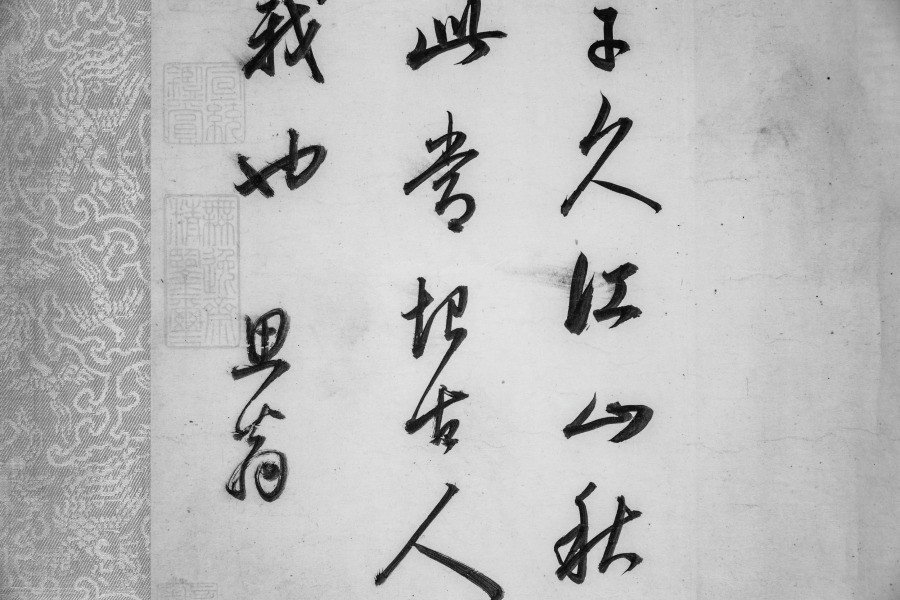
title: River and Mountains on a Clear Autumn Day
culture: China, Ming dynasty (1368–1644)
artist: Dong Qichang (Chinese, 1555–1636)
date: c. 1624–27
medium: Handscroll; ink on Korean paper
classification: Painting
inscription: 黃子久江山秋霽似此，當恨古人不見我也。思翁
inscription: 董文敏每遇高麗鏡面箋，書畫尤為入神。此卷改表紙用之，字跡隱然，兼有朝鮮之印。至於筆法圓秀，真接倪黃。豈文沈所可同日而語也。 康熙庚午中秋後一日，天氣澄爽，重裝初畢，跋於瓶廬。抱瓮翁高士奇。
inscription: Second inscription by Gao Shiqi 高士奇 (1645–1704): On the twenty-third day of the ninth month, the jiaxu year of the Kangxi era [1694], I packed my bags to head north. When my boat passed Wuchang [Suzhou], Mr. Mantang [Song Luo] brought wine to bid me farewell so that we could share our thoughts on our separation in the last few years. I showed him the paintings and calligraphy which I collected and asked his opinions. Since Mr. Mantang does not own any handscrolls by Wenmin [Dong Qichang], I leave this one for him in commemoration of our parting; thus the painting will have a worthy owner and our meeting will become a beautiful story in the future. It is the fourth day after the beginning of winter, with the sky clear and sober. Trees under frost have turned red and yellow, seemingly echoing the brush and ink in the painting. I also ask Mr. Mantang to inscribe a poem to commemorate our meeting so that it will survive forever.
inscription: 1 colophon and 4 seals of Song Luo 宋犖 (1634–1713): Who is the foremost art connoisseur of our dynasty?/ Tangcun [Liang Qingbiao, 1620–1691] is dead, so the title passes to Jiangcun [Gao Shiqi]./ Leaving office, you retired for five years in the Lake region./ Fondling handscrolls and hanging scrolls from morning to evening./ You sent me your collection catalogue Xiao Xia Lu last year;/ It is indeed the true equal of [Zhou Mi's] Yun Yan Guo Yan./ This year you returned to the capital by imperial order;/ Your boat with calligraphy and paintings anchored at the river bank in Suzhou./ When we met each other you did not waste any time for conversation by poured out immediately/ From your "coral net" extraordinary treasures./ You produced incomparable scrolls, with gold-inscribed labels and jade rollers,/ Pouring out from bags and trunks, they were spread in disarray./ Without a word, I rolled and unrolled until my fingers were numbed,/ We sat straight, facing each other quietly, and never felt tired./ For three days we forgot about sleeping and food./ And at times we shouted our joy out loud, forgetting who is host or guest./ Your Dwelling in the Fuchun Mountains and the Yuansheng manuscript/ These peerless works I myself examined with delight./ As an added pleasure to the farewell dinner under the Maple Bridge,/ You allowed me to hold again this handscroll by Dong Qichang--/ The Misty River and Piled Peaks [by Zhao Mengfu] and this Clear Autumn Day are two extraordinary masterpieces./ In showing such life and spirit with "qi yun." the artists were truly "men of heaven."/ The Clear Autumn Day is not even three feet long,/ Painted on tributary Korean paper, it shines like silver./ Every building up and every turn of the mountains imitates nature,/ Every tree and every rock is removed from the commonplace./ From the beginning, the theory of poetry is the theory of painting,/ Like the lotus and the morning sunshine, they complement and refresh each other./ The artist's inscription regrets that "the Old Masters cannot see my scroll."/ Huang Gongwang would have agreed in his grave./ The vermilion of the seals glitter and dazzles the eyes,/ These added accessories are as valuable as jade./ You are very kind to give it to me,/ The feelings expressed in your inscription are so sincere./ Wanting to refuse, but unable, I accept it to respect your wish,/ And taking off my gown and cap I wrapped it with care./ You asked me to write a long poem in commemoration of this beautiful occasion,/ I am too ashamed that my effort in response is so poor and inadequate./ Returning home, I unrolled it under candlelight, trying to write the colophon,/ The light of the waning moon shines at the foot of the mossy wall./ Earnestly humming and brows knit in deep thought, I try to compose;/ The verses are not outstanding, but the facts are real./ With this poem recorded at the end of the scroll, I mail it to you for approval,/ This poem and this painting shall outlast a thousand springs. (Translation by LYSL/HK/WKH)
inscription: 1 colophon and 2 seals of Shao Changheng 邵長蘅 (1637–1704); 2 inscriptions and 14 seals of the Qianlong 乾隆 emperor (r. 1736–95); 1 seal of the Jiaqing 嘉慶 emperor (r. 1796–1820); 3 seals of the Xuantong 宣統 emperor (r. 1908–11); 1 seal unidentified.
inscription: [印] 朝鮮國王之印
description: Dong Qichang had a tremendous impact on the artistic practices and historiography of later generations; his works and writings shaped literati aesthetics. Here, Dong places an abstract landscape composition diagonally across the picture plane, configured to recall earlier masters and simultaneously express his own personal style. Dong’s inscription claims, Huang Gongwang’s Autumn Day, looks like this. I truly regret the master has not seen my work. In fact, Dong Qichang may have had Dong Yuan’s Xiao and Xiang Rivers in mind, a work he owned and considered a key work in Chinese art history.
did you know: The painting has an imprint of a Korean seal that reads "Seal of the king of Joseon."